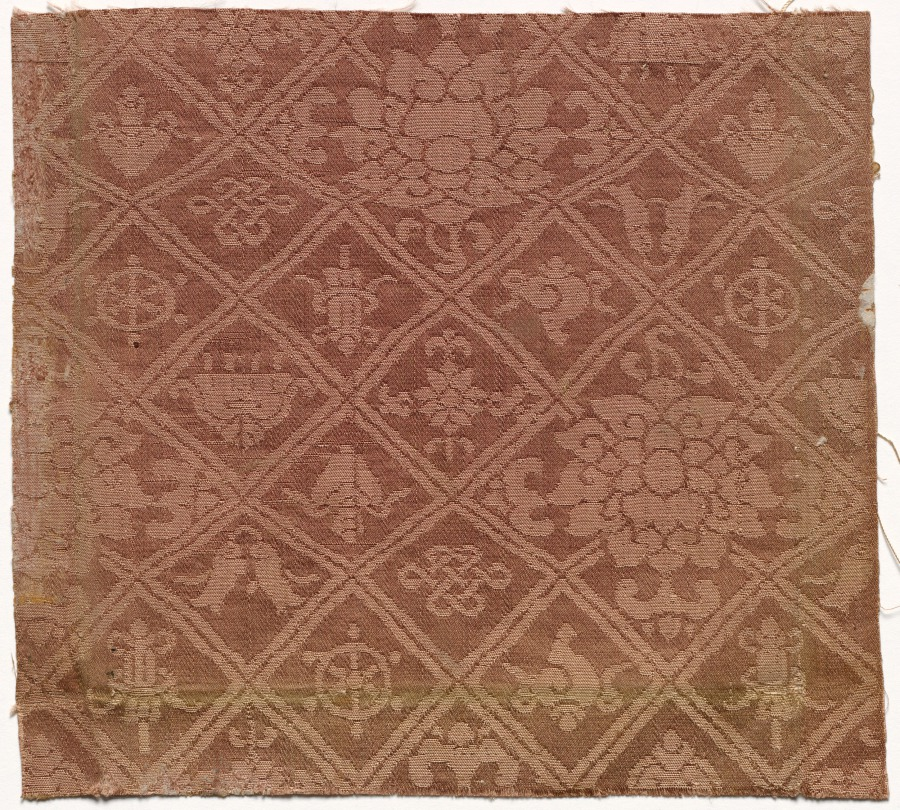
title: Fragment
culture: China ?, 19th century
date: 1800s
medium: silk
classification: Textile